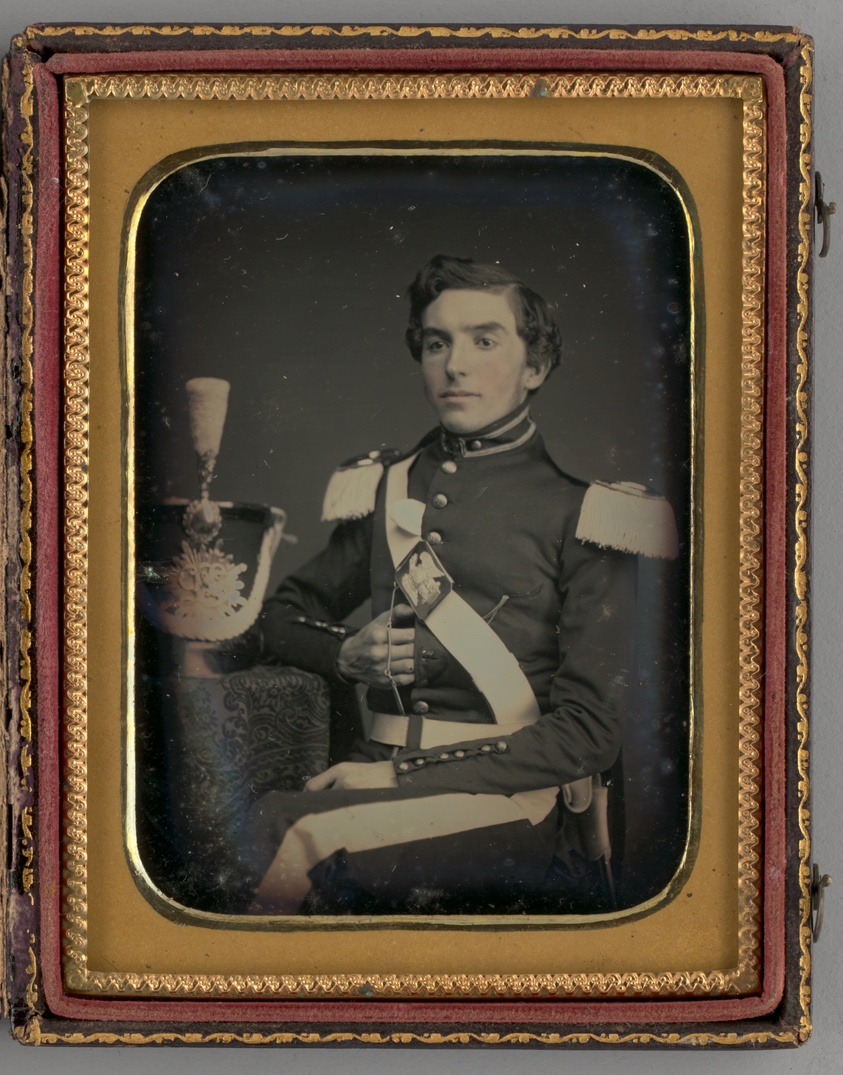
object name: Photograph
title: Untitled (Portrait of Seated Man)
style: 19th century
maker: Unknown maker; American, 19th century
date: 1853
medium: Daguerreotype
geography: United States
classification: portrait; daguerreotype; portrait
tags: lundberg collection, Male, photography, portrait, portraits, portraits: male subject